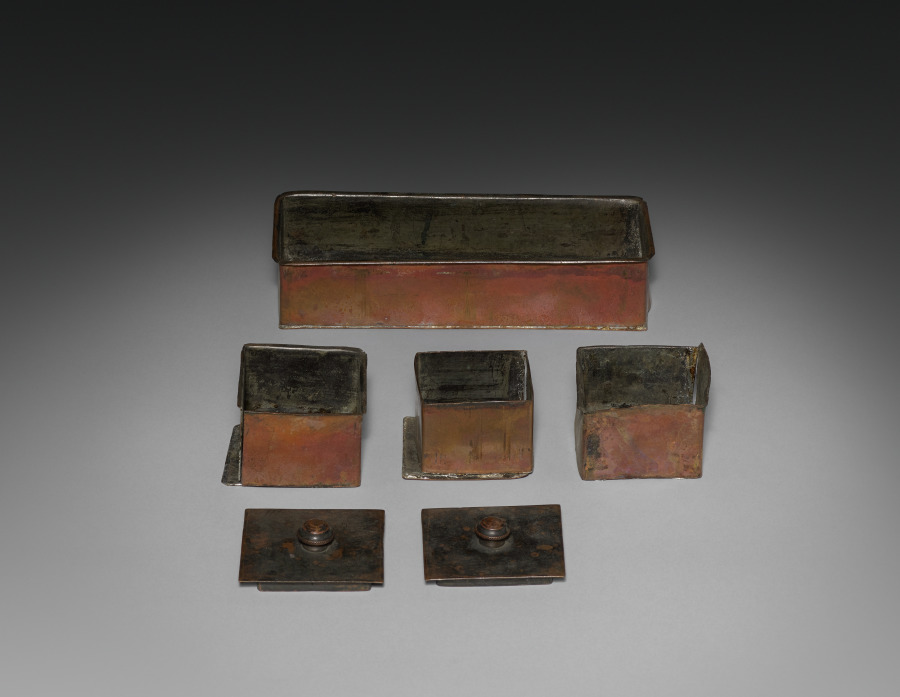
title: Writing Casket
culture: Italy, Ravenna, 16th century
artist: workshop of Severo da Ravenna (Italian, c.1496–c.1543)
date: c. 1525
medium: bronze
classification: Sculpture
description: The interior is divided into four compartments for storing writing implements and sand for blotting.